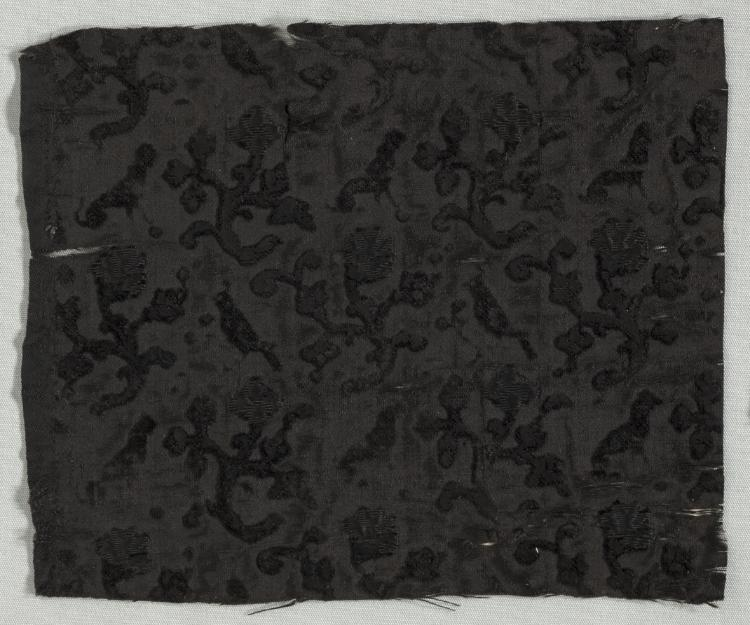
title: Velvet Fragment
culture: Italy, early 18th century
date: c. 1700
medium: velvet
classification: Velvet